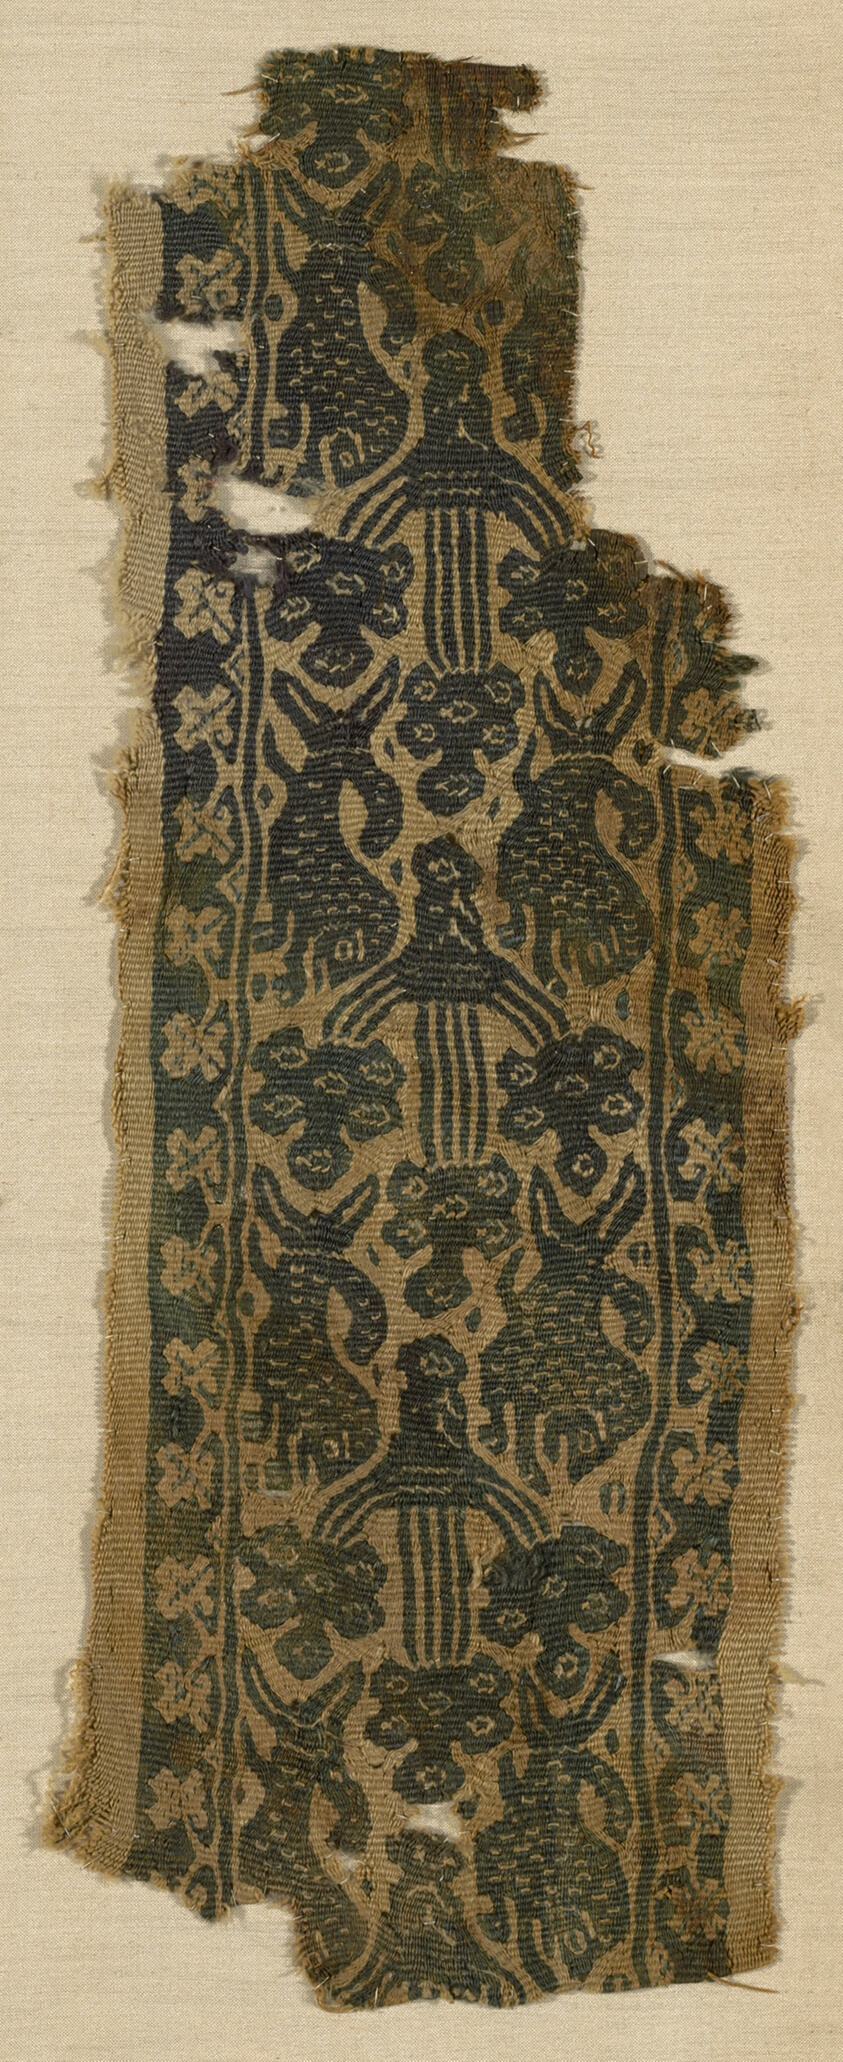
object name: Textile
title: Fragment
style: roman period (egyptian)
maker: Coptic (Egypt)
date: Roman period (30 B.C.– 641 A.D.), 5th/6th century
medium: Linen and wool, slit tapestry weave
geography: Egypt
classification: textile; weaving